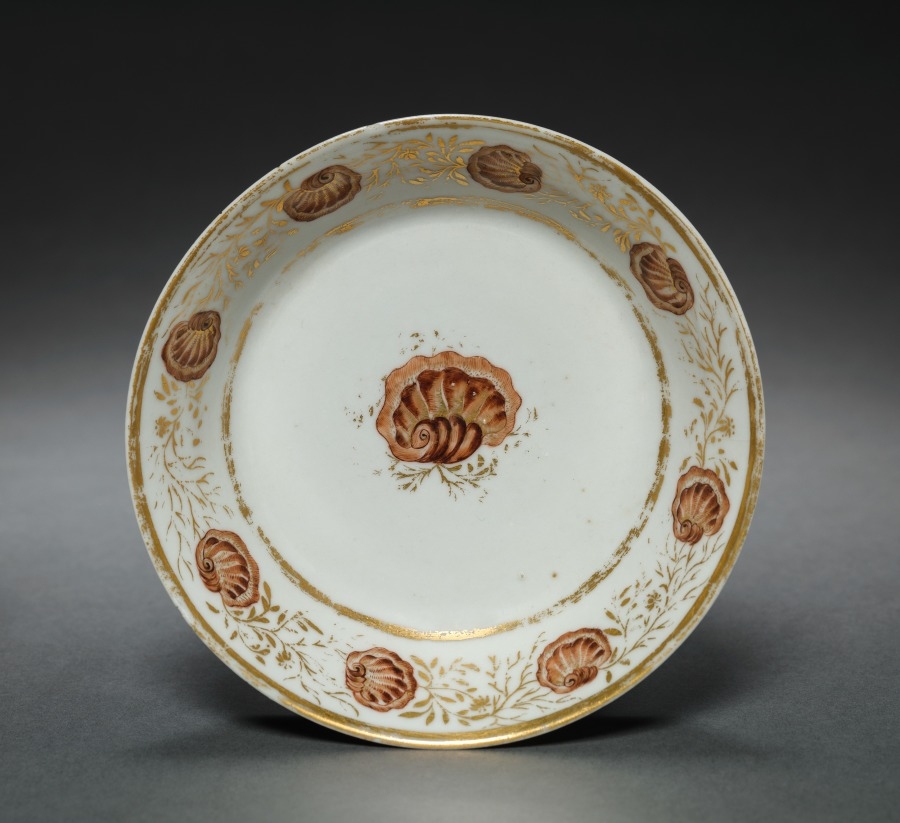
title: Saucer from Oliver Wolcott, Jr. Tea Service (1 of 6)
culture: Chinese Export porcelain, late 18th-early 19th century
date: 1785–1805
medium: porcelain, sepia enamel, gold leaf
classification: Ceramic